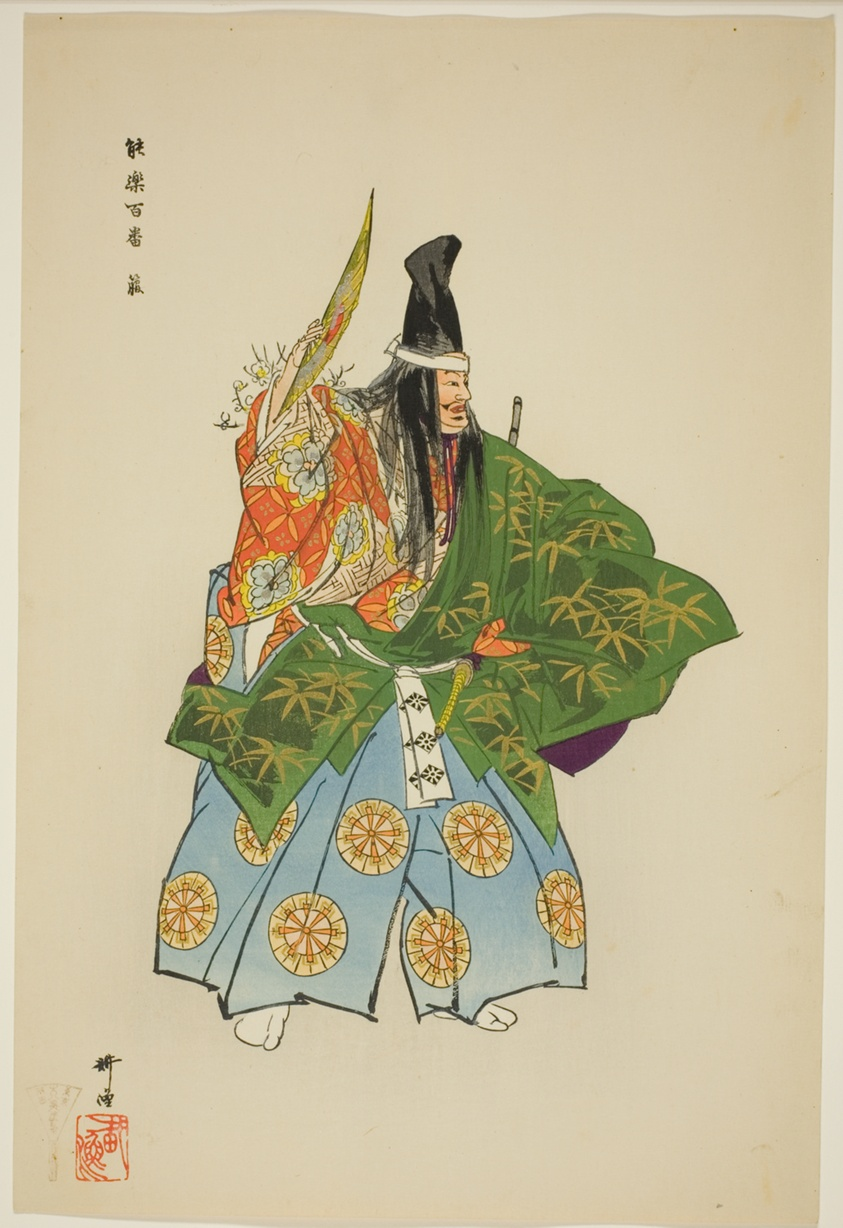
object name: Print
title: Ebira, from the series "One Hundred No Dramas (Nogaku hyakuban)"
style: Japanese (culture or style)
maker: Tsukioka Kogyo; Japanese, 1869-1927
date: 1898/1903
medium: Color woodblock print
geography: Japan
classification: woodblock print; print; asian art